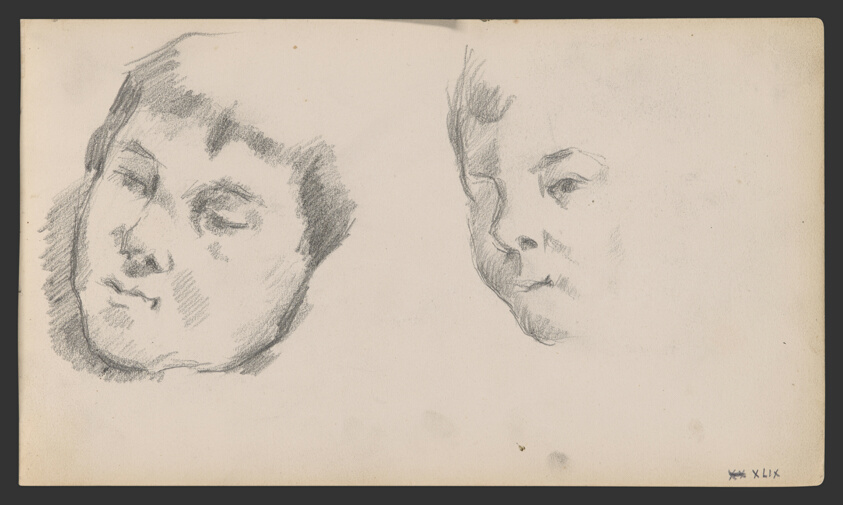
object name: Drawing and Watercolor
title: Sketchbook No. 2 (L'Estaque)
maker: Paul Cézanne; French, 1839-1906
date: 1875–86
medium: Graphite and pen and ink drawings on paper, bound into a book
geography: France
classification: sketchbook; graphite; prints and drawing; paper